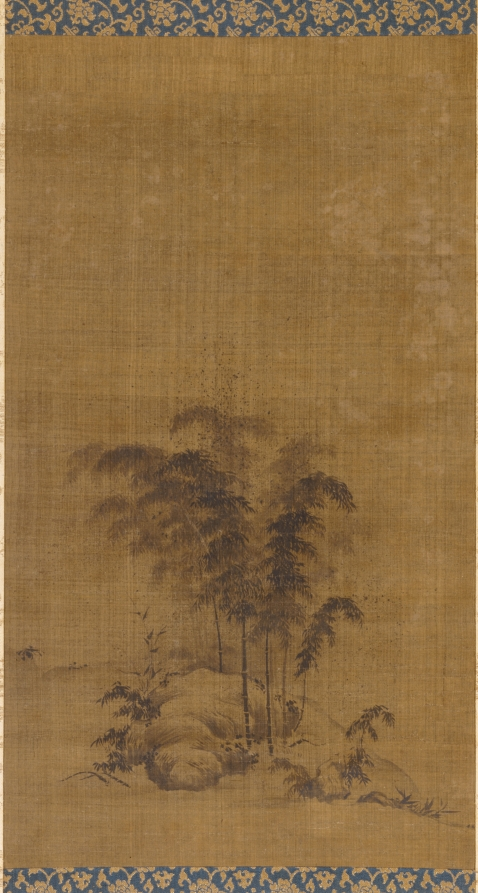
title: Bamboo Landscape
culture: China, Southern Song dynasty (1127–1279)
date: 1127–1279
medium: hanging scroll; ink on silk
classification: Painting